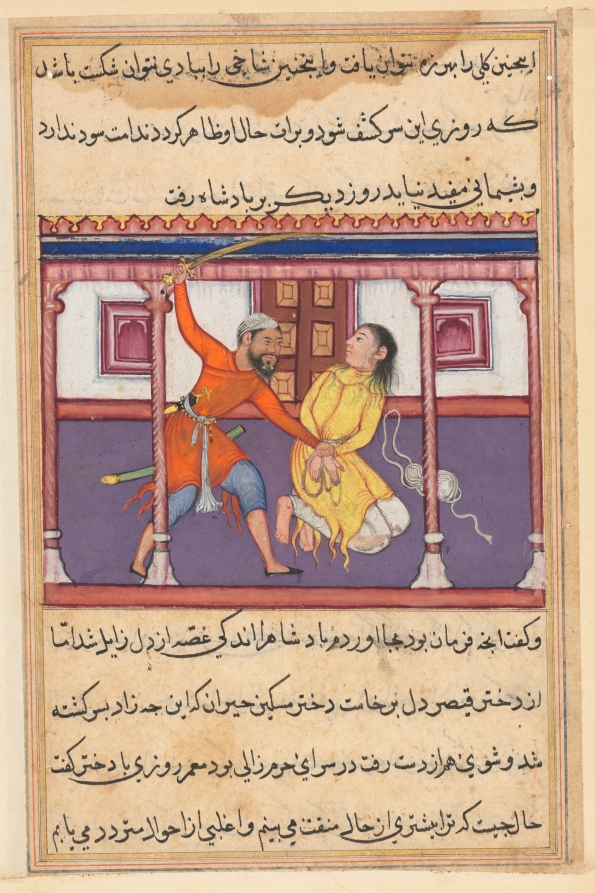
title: The guard spares the life of the slave when he learns that he is the son of the princess of the Rum, from a Tuti-nama (Tales of a Parrot): Fiftieth Night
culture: Mughal India, court of Akbar (reigned 1556–1605)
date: c. 1560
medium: gum tempera, ink, and gold on paper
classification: Painting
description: The king, mistakenly believing that the princess’s secret son is her lover, orders him to be executed. The young man is shown with hands bound and long hair in disarray; his unraveled turban lies on the ground at his side. Just before the guard can behead him, the princess’s son reveals his true identity, and his life is spared.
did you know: The guard hides the princess’s son and does not reveal his identity to the king.